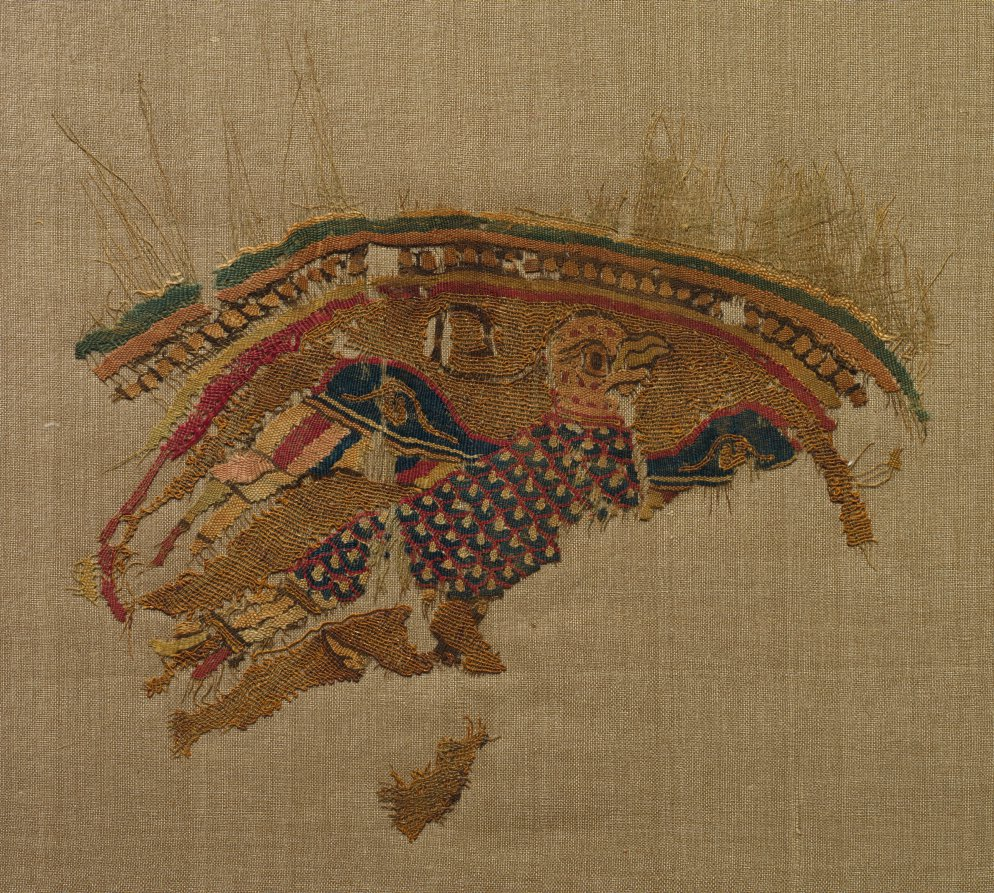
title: Fragmentary roundel with eagle in gold ground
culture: Egypt, Fatimid period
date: 1000s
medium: linen, silk, and gold filé: plain weave with inwoven tapestry weave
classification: Textile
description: This plain weave fragment contains an ornamental bird with outstretched wings encircled by a pearled frame.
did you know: The gold threads were not beaten up and therefore form loose, open weave in contrast to rest of the silk tapestry.